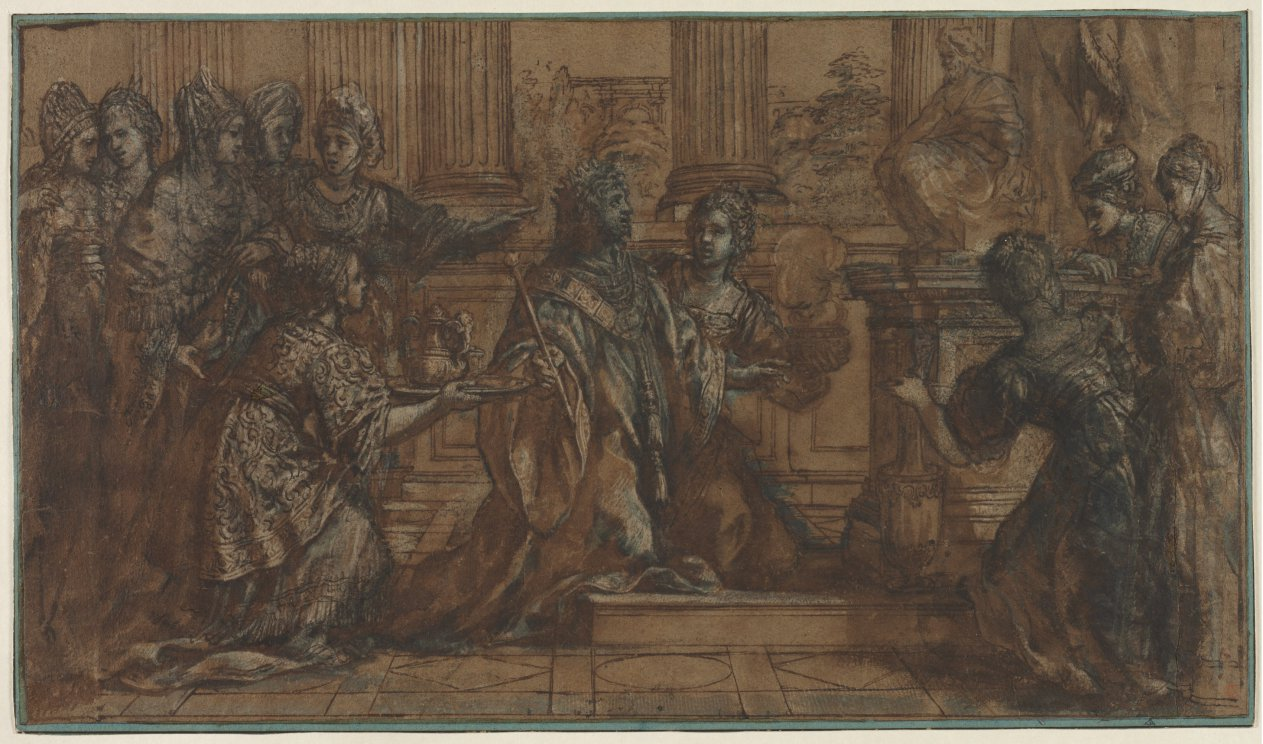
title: The Idolatry of Solomon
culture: Italy, 17th century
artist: Pietro da Cortona (Italian, 1596–1669)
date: 1622–23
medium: Pen and brown ink, point of brush and black ink, brush and brown wash, and white and blue gouache, framing lines in brown ink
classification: Drawing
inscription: verso of secondary support, upper center, in graphite: 44; center, in blue ballpoint: Maria Elvira Celia Mendez de Bernasconi [underlined] / 1977; center, in graphite: Paolo Farinato; center, in graphite: [illegible]; lower left, in graphite: [illegible, partially masked]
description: Pietro da Cortona was one of the most successful and active fresco painters in Rome in the mid-1600s. This drawing is a preparatory sheet—highly worked-up with many different mediums—for one of the artist's six frescoes portraying the story of Solomon commissioned by the Roman nobleman Asdrubale Mattei (1556-1638) for the gallery of his Palazzo Mattei di Giove. Reflecting the artist's as well as his patron's interest in classical antiquity, Cortona combined a classical relief-like composition with specific references to Roman objects and architectural elements in the composition. The subject represents a foolish episode from Solomon's life, when he was lured into the worship of idols by the "foreign" women with whom he kept company.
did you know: Pietro da Cortona completed this drawing and the six frescoes related to it for a prominent patron and palazzo in Rome when he was just 27 years old.